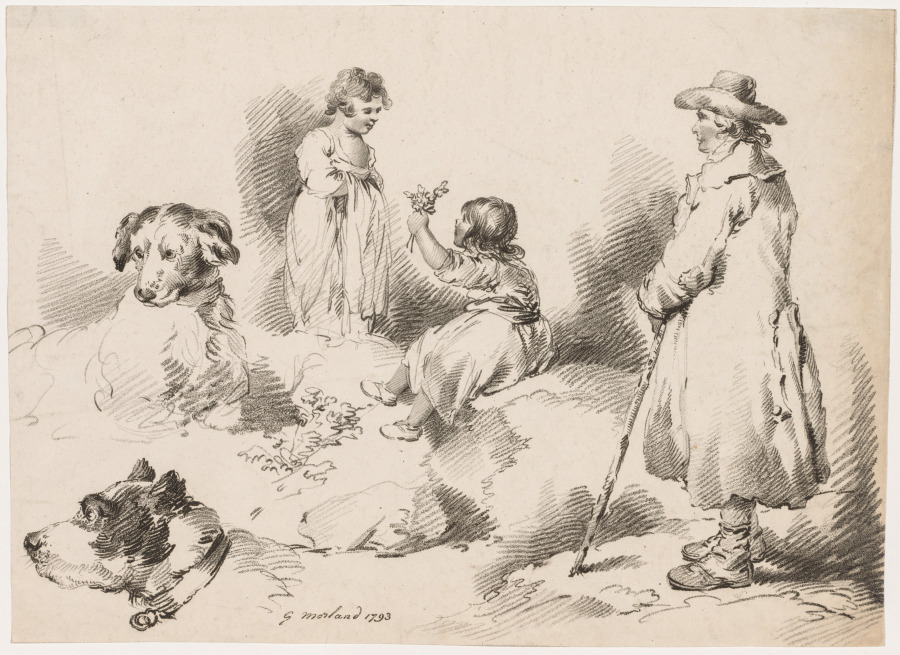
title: Studies of Children (Two Little Girls); Two Dogs; A Man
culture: England, Late 18th century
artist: after George Morland (British, 1763–1804)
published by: J. Harris, Gerrard Street, Soho, London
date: 1793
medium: Chalk manner etching and engraving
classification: Print